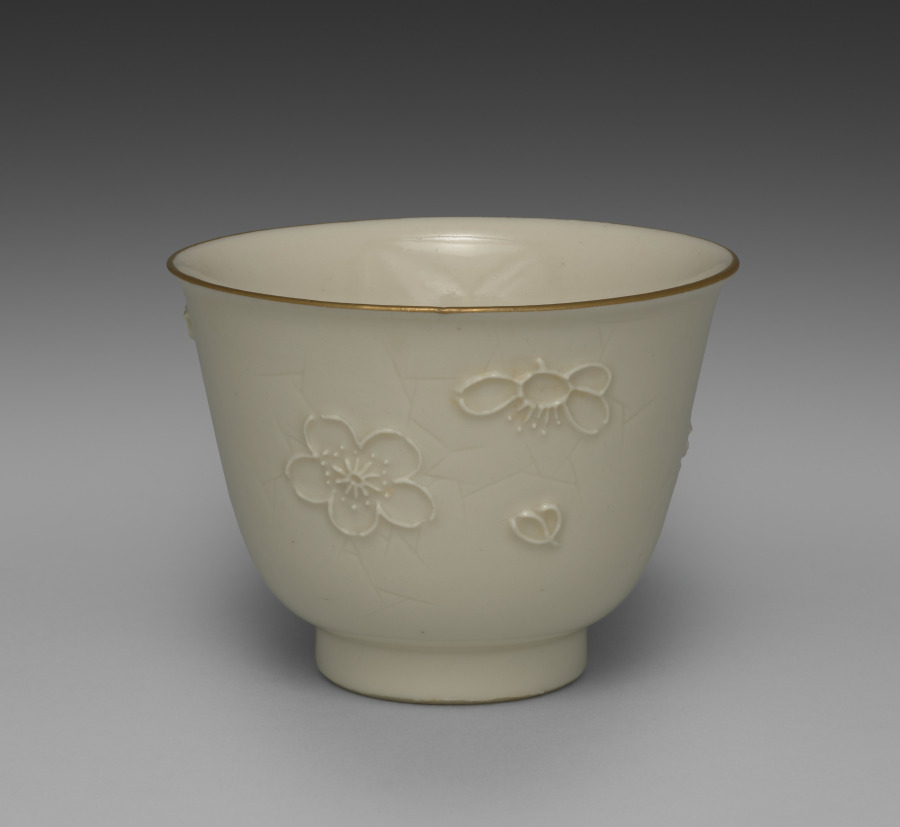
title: Drinking Cup from Dining Set with Plum Blossoms and Cracked-Ice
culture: Japan, Meiji period (1868–1912)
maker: Seifū Yohei II (Japanese, 1844–1878)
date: c. 1875–78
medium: Porcelain with molded designs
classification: Ceramic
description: Each item in this set has a delicate low-relief design of flowering plum branches over scattered, intersecting lines meant to resemble the cracked-ice surface of a frozen body of water and is signed on the base in gold pigment. While Yohei II produced many fine works in underglaze blue, like those produced by Kiyomizu Shichibei, he also made works in quite different styles later in his career, from the early 1870 s. In 1873, he was appointed purveyor to the Industrial Center of Kyoto Prefecture, a designation associated with Kyoto’s efforts to reach an international market through the port of Kobe; and from 1875 until his death, he was involved in national-level projects to present Japanese ceramics across the world. It was during this period that Yohei III was apprenticed to Yohei II, and it has been suggested that this set may in fact be an early example of Yohei III’s work, which he signed with his teacher’s name. Decorated with flowers resembling Japanese textile motifs, the set calls to mind the design of Yohei II’s pair of vases with plum blossoms in the Victoria and Albert Museum. Here, the elaborate trees created for a formal public exhibition setting have been translated into the approachable blossoms of the genteel domestic environment. While the designs are consistent across the pieces, each raised flower petal and pistil and each incised line in the ice was done by hand, so the cups, bowls, and dishes are similar yet unique. The bottoms of two boxes once identified the set’s owner, but the information has been deliberately obscured with black ink. However, inscriptions still visible appear to indicate two occasions, once at the end of July 1886 , and once again in June 1916 , when parts of the set were requested from Hokura in Niigata Prefecture. The location corresponds to a neighborhood in the present-day city of Jōetsu. The surname Tsuji 辻 also appears on a paper tag affixed to one of the box cloths. Future research may possibly reveal more about their provenance. A vase by Yohei III in a private collection combines the formal grandeur of the Yohei II vases in the Victoria and Albert Museum with the gentler design of this dining set, placing flowering plum trees against soft, scalloped-edge clouds resembling those in golden screens.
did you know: The dining wares have a creamy white coloration that the four boxes containing them identify as Korean in style.